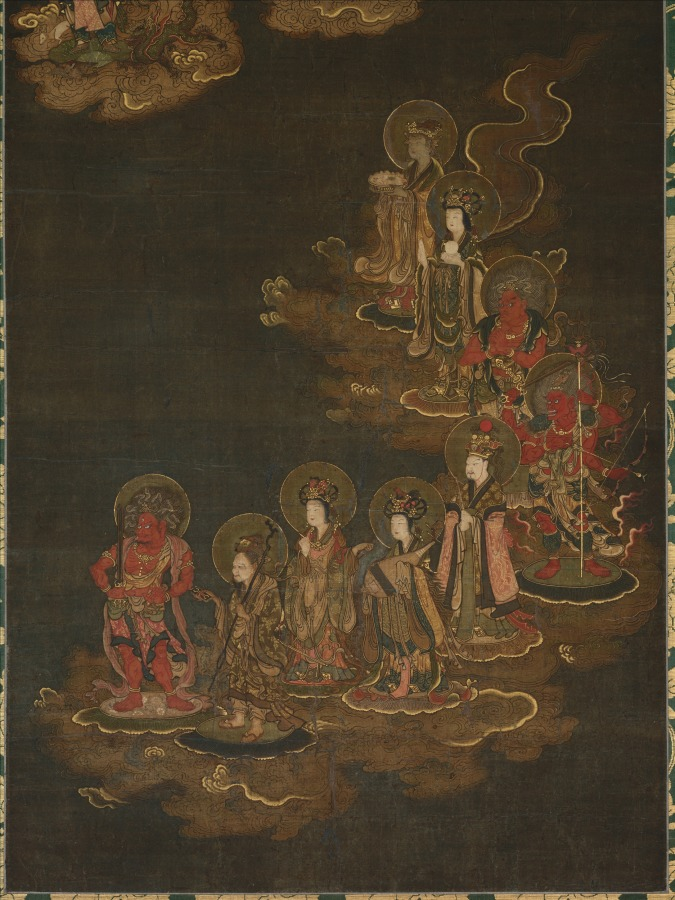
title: Descent of the Nine Luminaries and the Seven Stars at Kasuga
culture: Japan, Nanbokuchō period (1336–92)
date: mid- to late 1300s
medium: Hanging scroll; ink, color, gold and cut gold on silk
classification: Painting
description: This medieval religious painting shows celestial beings descending from the heavens into the Kasuga Shrine, a major religious site in Japan's ancient capital, Nara. The moon and the Kasuga mountain range appear in the uppermost portion of the painting, as does a red shrine entrance gate, or torii. In the upper part of the painting, figural representations of the stars in the constellation known as the Big Dipper in the West descend from right to left on cloud banks. In the lower part, the Nine Luminaries (Sanskrit: Navagraha) that emerged from the Vedic tradition—the sun and moon; the planets Jupiter, Mars, Saturn, Venus, and Mercury; and personifications of the fluctuating lunar nodes—descend in similar fashion. The painting uses the "deities in descent" scheme originating in China, as well as the original Buddhist form mandala (Japanese: honjibutsu mandarazu) format prevalent in medieval Japanese Shinto-Buddhist painting, to generate an image connected to the worship of celestial bodies in Esoteric Buddhism.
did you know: A 19th-century copy of this painting in ink and light color exists at the Kyoto City University of Arts.